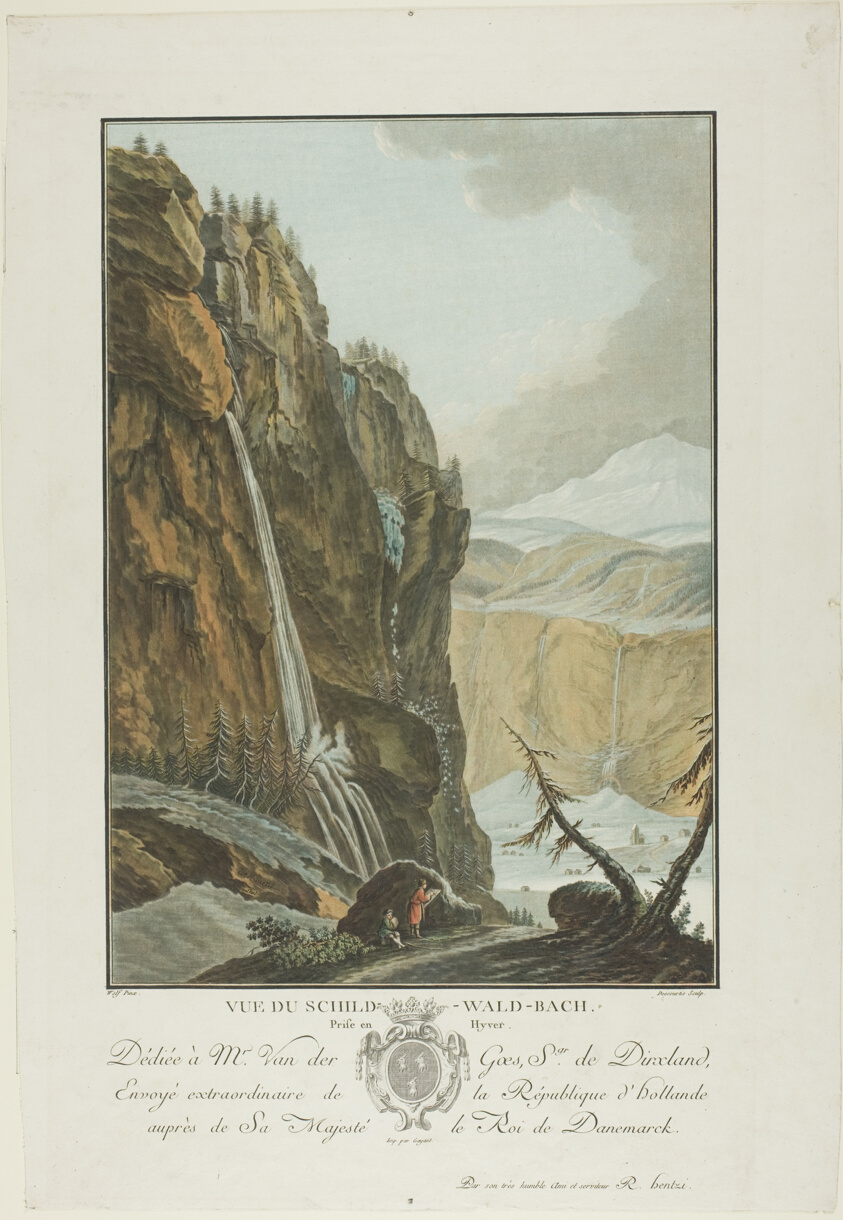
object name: Print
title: Vue du Schild-Wald-Bach, Prise Enhiver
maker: Charles-Melchior Descourtis; French, 1753-1820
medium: Color aquatint with etching and engraving in black ink on ivory laid paper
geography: France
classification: aquatint; print; prints and drawing